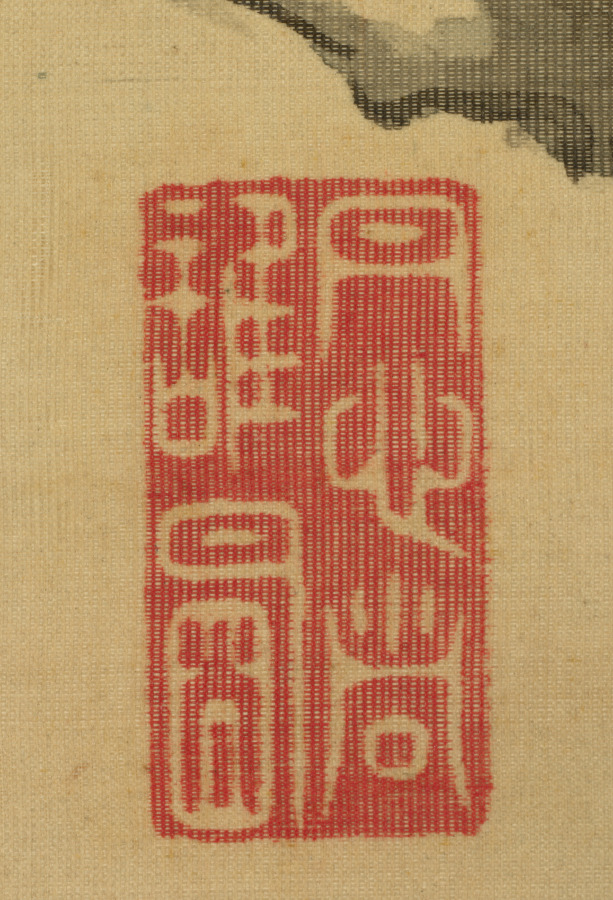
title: Symbols of Longevity: Deer under Peach and Pine (Pine) (right)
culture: Japan, Edo period (1615–1868)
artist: Toda Tadanaka (Japanese, 1761–1823)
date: 1801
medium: Pair of hanging scrolls; ink and color on silk (ivory roller ends)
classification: Painting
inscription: Righthand painting sealed lower right: rectilinear red seal above; unread, square red seal below; unread (a collector's seal)